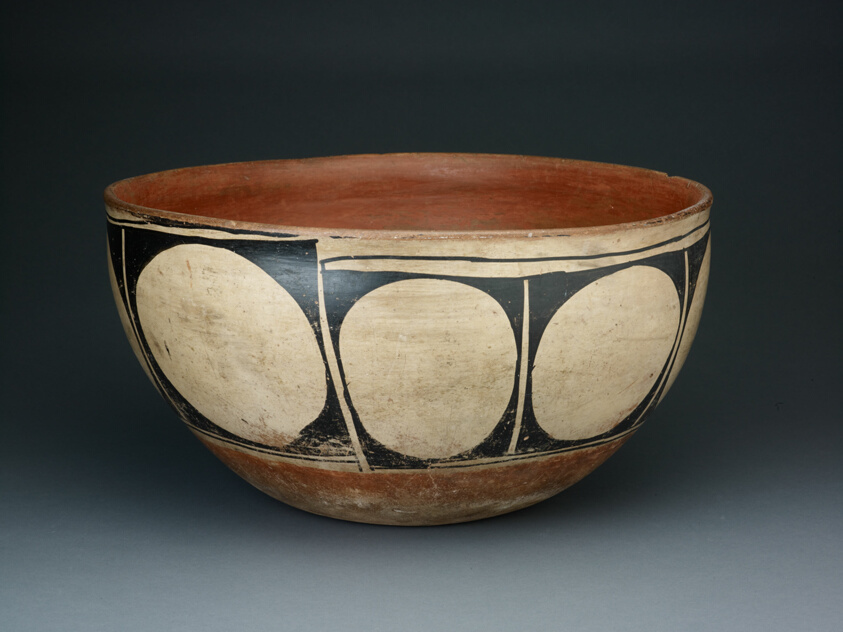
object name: Vessel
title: Polychrome Bowl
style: santo domingo, southwest, pueblo, kiua, americas, native american, native north american, Arts of the Americas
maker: Santo Domingo, Kiua polychrome; Santo Domingo Pueblo, New Mexico, United States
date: 1880–1900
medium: Ceramic and pigment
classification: bowl; ceramics; vessel; art of the americas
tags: storage, circles, geometric, servingware